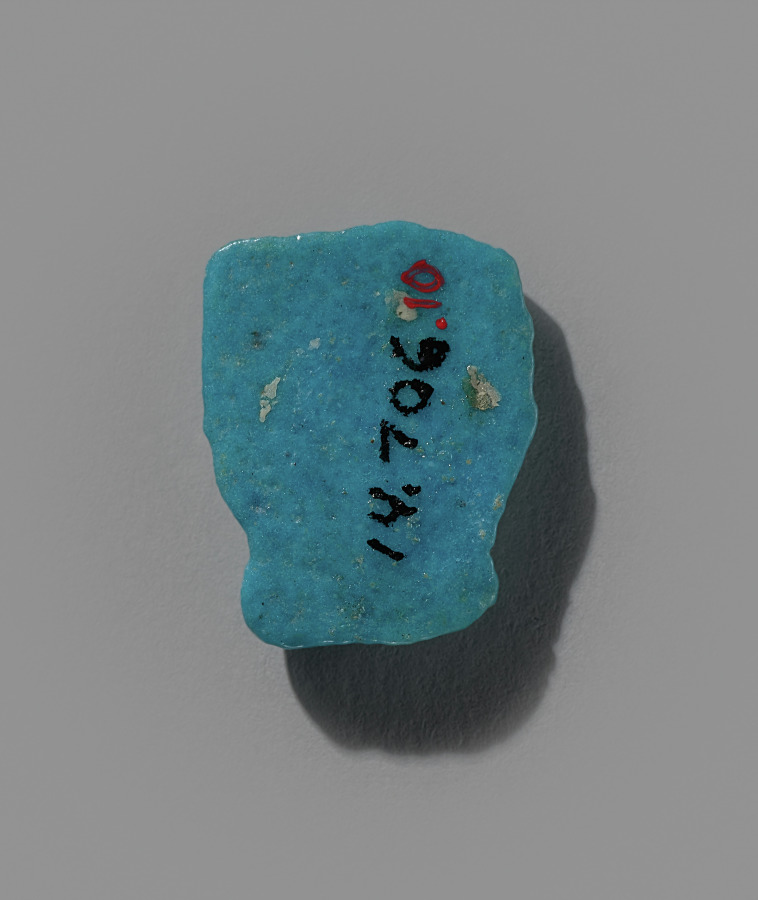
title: Food Model Amulet: Brace of Duck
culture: Egypt, New Kingdom (1540–1069 BCE), Dynasties 19–20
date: 1295–1069 BCE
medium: turquoise faience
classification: Amulets